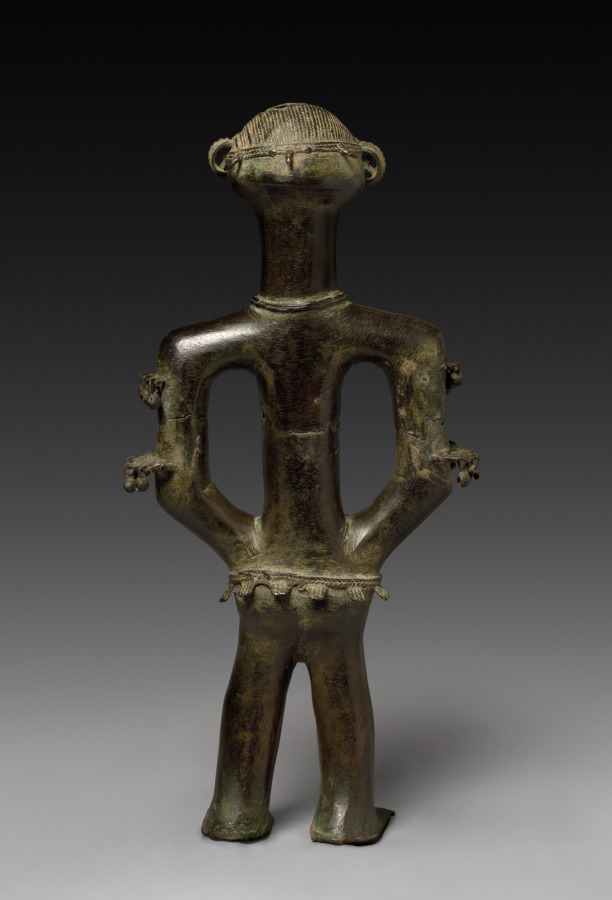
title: Male figure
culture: Africa, West Africa, Nigeria, Benue River Valley, Unidentified maker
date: probably 1800s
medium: Copper alloy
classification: Sculpture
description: Realized in a very distinctive style using the lost-wax method, this figure’s cultural origin and function is limited because it was removed from Nigeria during that country’s turbulent civil war of the late 1960s. Perhaps it was once part of an altar or shrine dedicated to a guardian or tutelary spirit. Connotations of prestige and wealth may explain why copper-alloy objects were diffused across vast territory and inherited over many generations.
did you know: Figurative copper-alloy objects like this sculpture point to intense trade and the circulation of people, goods, and technologies in the Benue River Valley, resulting in a highly cosmopolitan society.